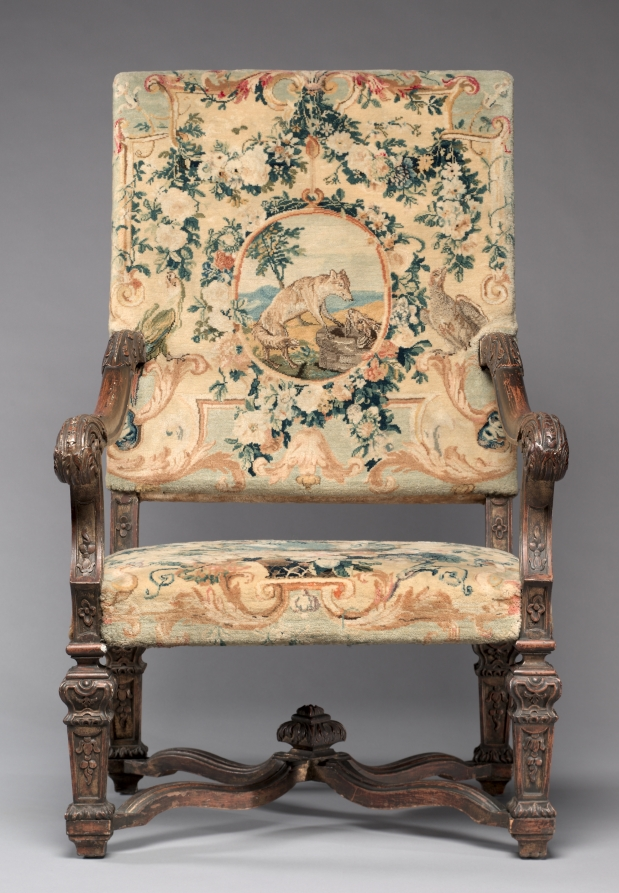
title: Armchair (2 of 4)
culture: France, 18th century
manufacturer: Royal Savonnerie Manufactory, Chaillot Workshops (French, est. 1627)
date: before 1717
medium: carved wood, Savonnerie knotted-pile (symmertrical rug knot) upholstery; wool, hemp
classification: Furniture and woodwork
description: These chairs belong to a suite that includes a settee (also in the CMA’s collection) and a tapestry made for a count and countess to mark their wedding in 1717. Furniture of this scale was usually placed against the wall in grand reception halls, more as a display of wealth than for use. Upholstered in Savonnerie tapestries, this suite was among the most treasured and expensive example anyone could own and typically reserved for royalty. To add decorative and intellectual interest to the textiles, weavers incorporated symbols depicting various stories from the Fables of Jean de La Fontaine, published from 1668 to 1694 and largely adapted from Aesop and other early storytellers.